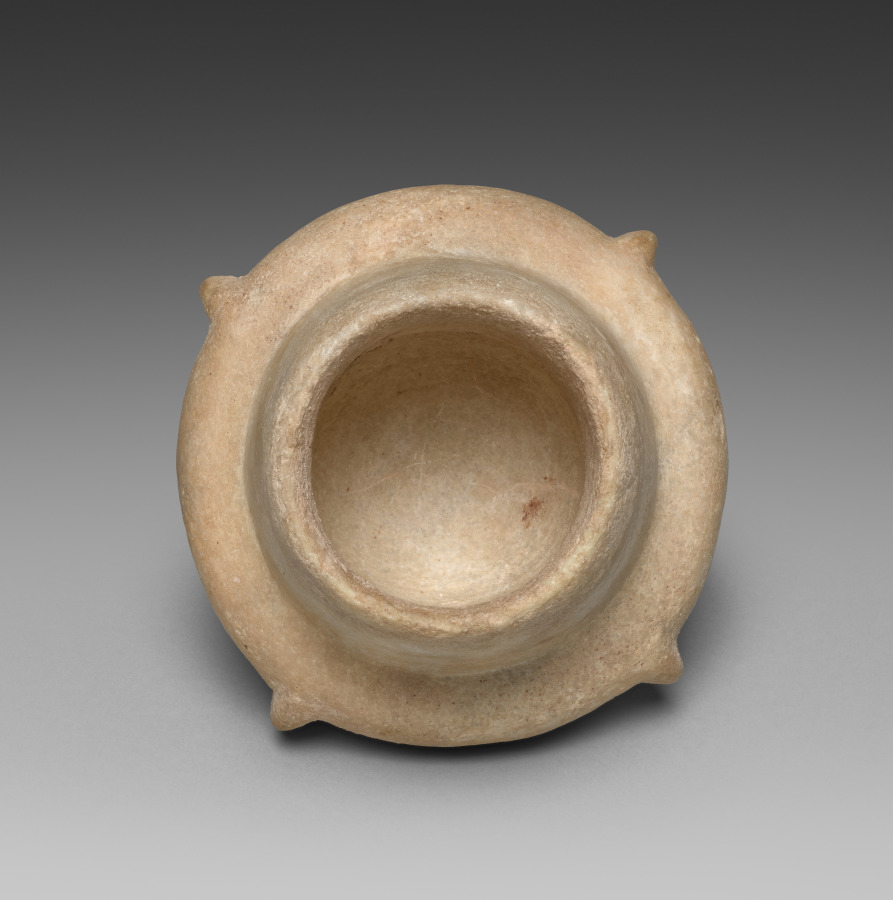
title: Kandila (Collared Jar with Conical Foot)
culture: Greece, Cycladic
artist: Master A (Greek)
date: 3000–2950 BCE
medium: marble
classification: Sculpture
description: Kandila, the modern Greek word used by archaeologists for Early Cycladic stone jars like this one, also refers to a type of hanging oil lamp, similar in shape but made of metal and still used in some Greek Orthodox churches. Despite this name and the formal similarity, the primary function of the prehistoric kandila remains uncertain. The holes drilled through each of its four lugs may have been used for hanging or to secure a lid.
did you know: "Cycladic" refers to a group of Aegean islands where vessels like this were made.